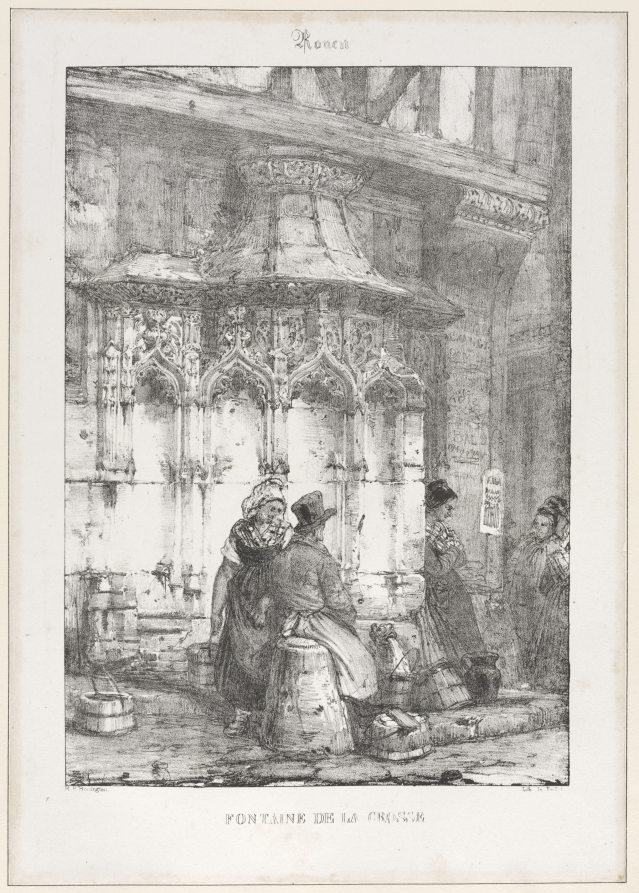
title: Architectural Remains and Fragments: Rouen - Fontaine de la Crosse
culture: England, 19th century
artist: Richard Parkes Bonington (British, 1802–1828)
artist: after François Alexandre Pernot (French, 1793–1865)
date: 1827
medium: lithograph on chine collé tipped into mount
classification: Print